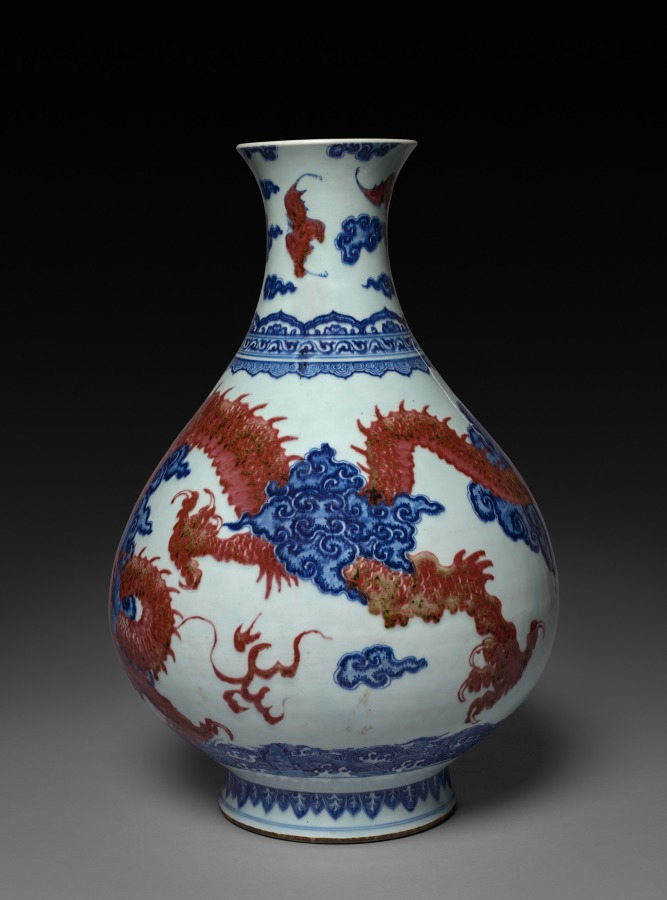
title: Vase with Dragon and Cloud Decoration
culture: China, Qing dynasty (1644-1911), Yongzheng reign (1723-35)–Qianlong reign (1736-95)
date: mid- to late 1700s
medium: porcelain with underglaze blue and red decoration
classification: Ceramic